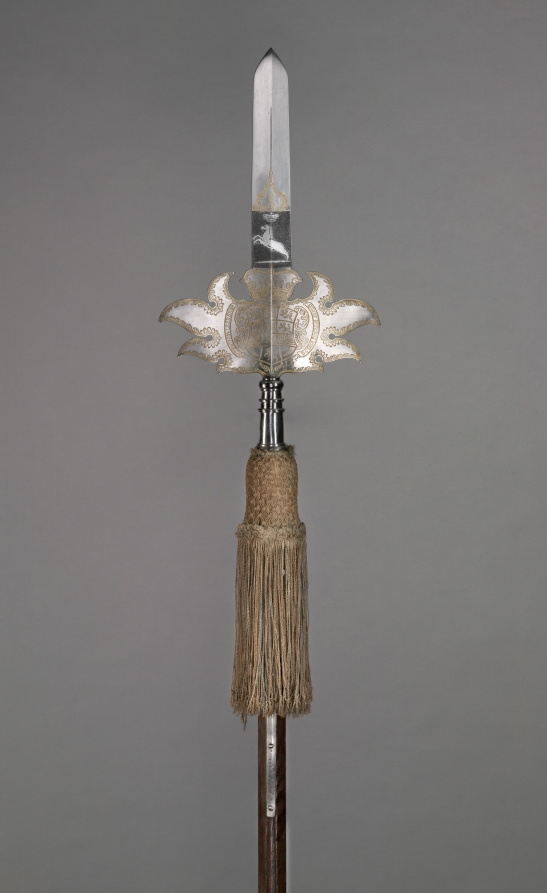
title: Parade Partisan (from the Bodyguard of August Wilhelm, Duke of Brunswick- Wolfenbüttel [1662-1731])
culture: Germany, 18th century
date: 1718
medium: blued, etched and gilded steel, wooden haft with orginal steel base spike, silk tassel with alternating blue and gold bands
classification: Arms and Armor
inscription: AUGUST WILHELM/DG DUX BRUNS EA LUNEB; 1718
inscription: HAW II; PARTA TVERI; 1718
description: The halberd and partisan are hafted weapons highly favored by European infantries of the 1500s and 1600s for their great versatility and deadly effect. From about 1550 on, these weapons underwent significant changes as they gradually became more ornamental. The large flat surfaces of the blades lent themselves to engraving, etching, gilding, and other forms of decoration. They also provided the perfect location for the coats of arms of princely or noble families. For this reason, hafted weapons became the favored parade weapons of palace guards and splendidly outfitted special regiments of princely bodyguards. These examples, made for the German dukes of Brunswick at Schloss Blankenburg, still have their silk tassels in their original colors of blue and yellow.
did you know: Partisans were popular weapons before firearms.